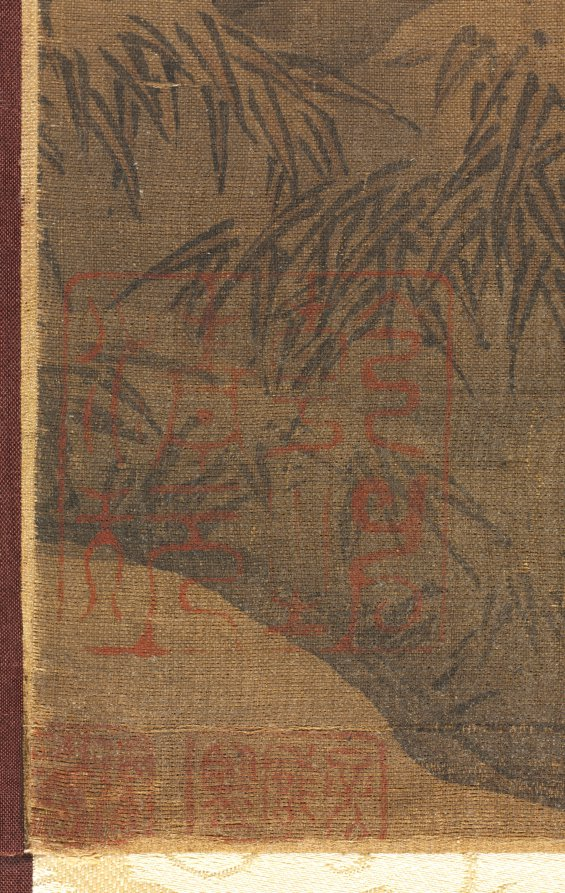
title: Birds in a Grove in a Mountainous Winter Landscape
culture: China, Jin dynasty (1115-1234)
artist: possibly by Gao Tao (Chinese, 1100s)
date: 1100s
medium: hanging scroll; ink and slight color on silk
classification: Painting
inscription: A signature and a seal at lower left edge: Gao Tao 高燾; seal undecipherable. 10 additional seals: 1 of Zhu Gang 朱棡 [1358–1398]; 3 of Suo’etu 索額圖 [1636–1703]; 2 of A’erxipu 阿爾喜普 [1700s]; 1 of Weng Fanggang 翁方綱 [1733–1818]; 3 unidentified.